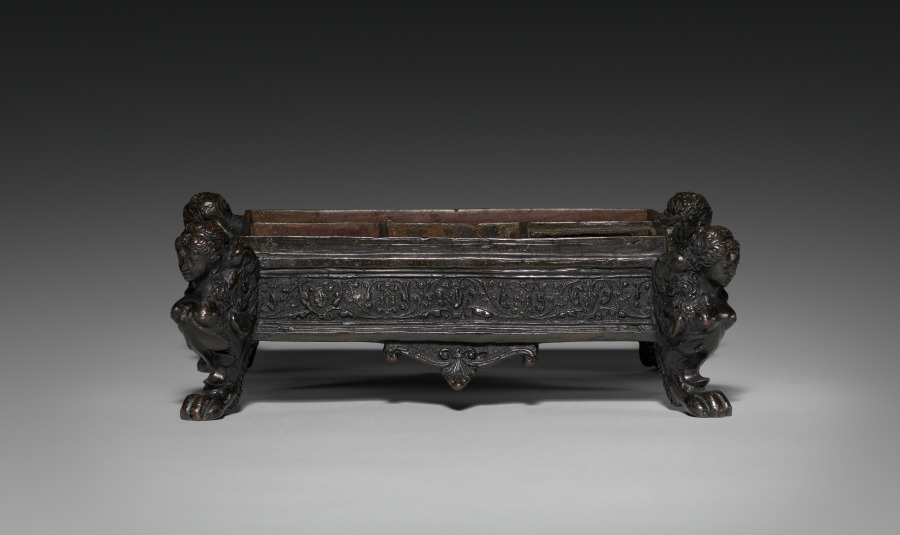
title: Writing Casket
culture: Italy, Ravenna, 16th century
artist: workshop of Severo da Ravenna (Italian, c.1496–c.1543)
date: c. 1525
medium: bronze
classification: Sculpture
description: The interior is divided into four compartments for storing writing implements and sand for blotting.